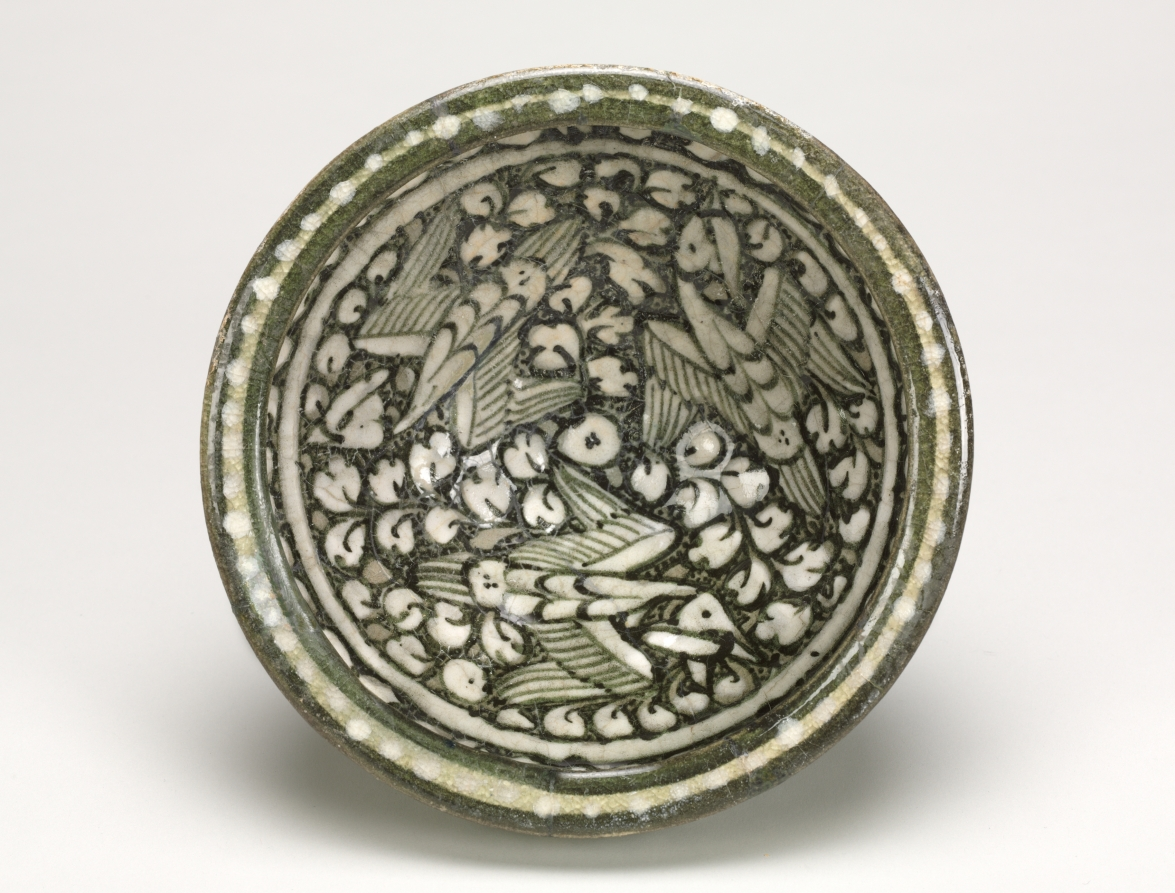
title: Bowl with Flying Birds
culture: Iran, probably Kashan, Ilkhanid period (1256–1353)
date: 1280–1400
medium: Fritware with underglaze-painted design, Sultanabad ware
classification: Ceramic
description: During the Ilkhanid period, decorative motifs from China were adopted into Persian art, including dragons, phoenixes, and lotus blossoms, which are seen on this bowl. Lotus blossoms were easily integrated into the existing tradition of floral and vegetal elements in Islamic art, while the phoenix was equated with the simurgh, a mythical bird known from the epic Persian poem the Shahnameh, or Book of Kings. The white slip designs on a gray background are typical of these wares, while the flat rim is influenced by Chinese vessels. This type of pottery was widely exported, and possibly imitated, as it has been found in excavations from Central Asia to Egypt.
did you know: This bowl was made after the Mongol conquest of Iran in the 13th century.